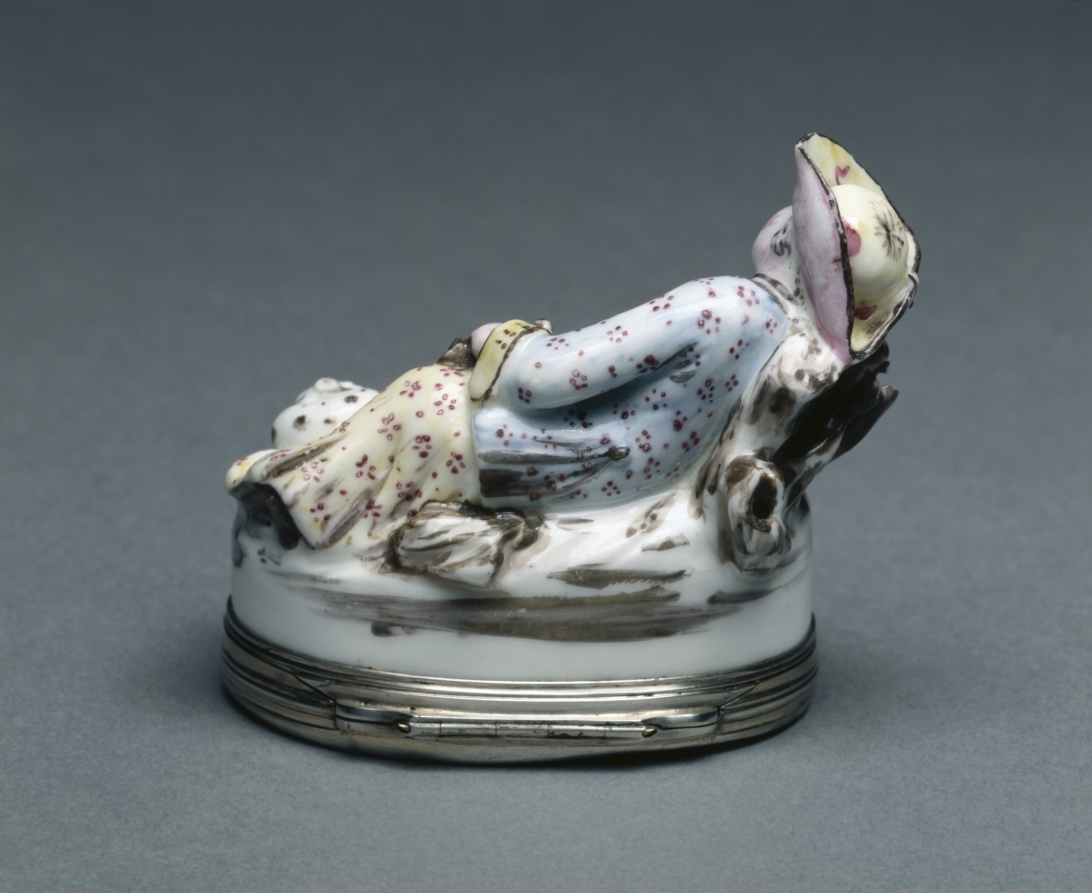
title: Box with Reclining Huntress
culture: France, Mennecy, 18th century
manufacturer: Mennecy Factory (French)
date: c. 1753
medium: soft-paste porcelain mounted in silver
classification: Ceramic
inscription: porcelain unmarked